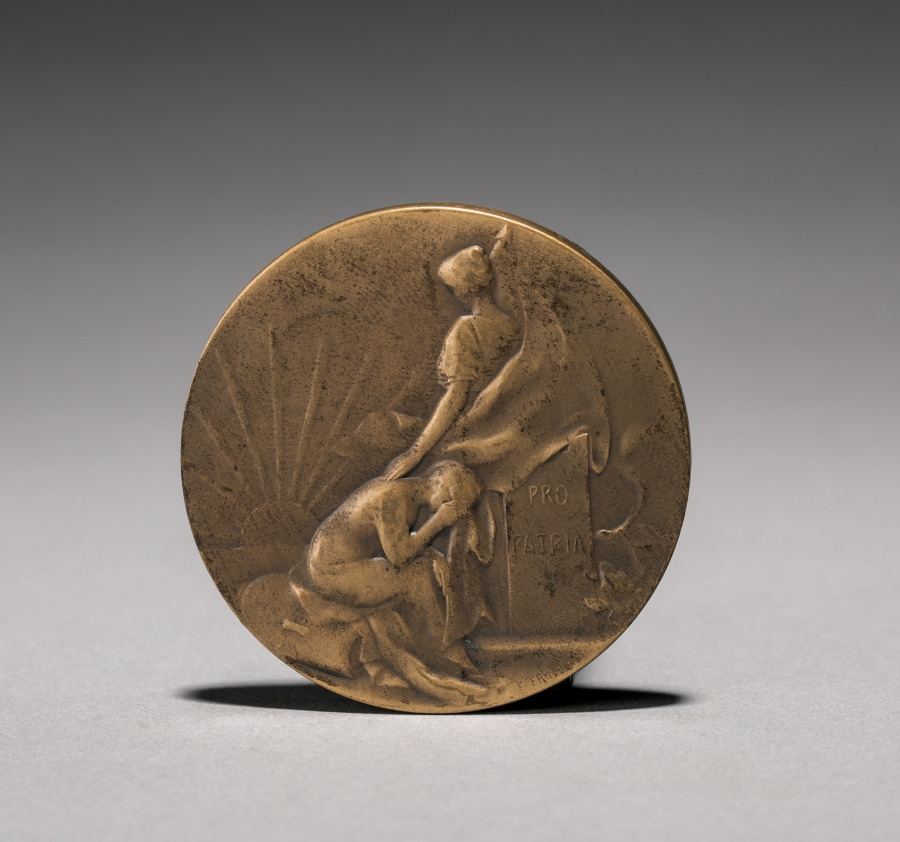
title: Medallion (obverse)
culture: France, 20th century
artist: Edouard Fraisse (French, 1880–1945)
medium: bronze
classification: Metalwork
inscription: "Pro Patria" (for the fatherland); signed: "E. Fraisse."